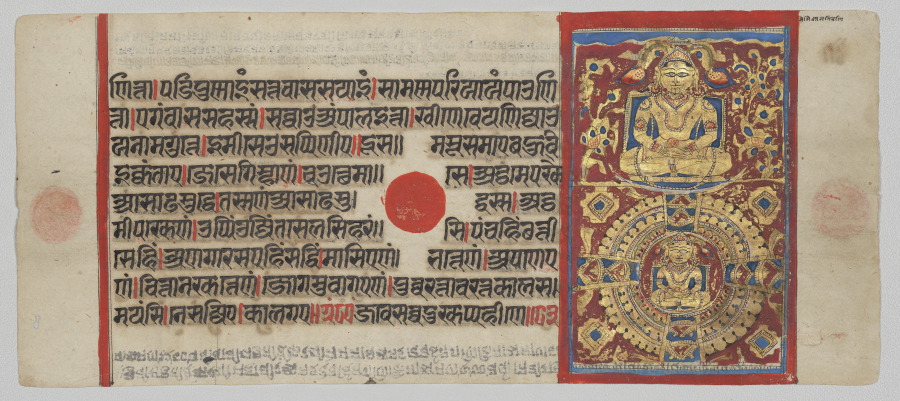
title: Nemi's Omniscience and First Teaching (below) and Nemi in the Realm of Liberation (above), Folio 51 (recto), from a Kalpa-sutra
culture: Western India, Gujarat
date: c. 1475–1500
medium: Gum tempera, ink, and gold on paper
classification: Painting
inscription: [[upper right]] Nemi jñāna nirvāṇa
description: Nemi, who was the cousin of the Hindu god Krishna, lived in the ancient mythic past. Like every other Jina, after achieving enlightenment he gave a mystical teaching to all the gods and animals and appeared to the assembly simultaneously in all directions. This exposition of Jain teachings is depicted by the circular diagram with Nemi seated in the center. The crescent moon under the seated figure of Nemi at the top of the page reveals that he is depicted in the realm of liberation, above the world of birth and death, in eternal meditative bliss.